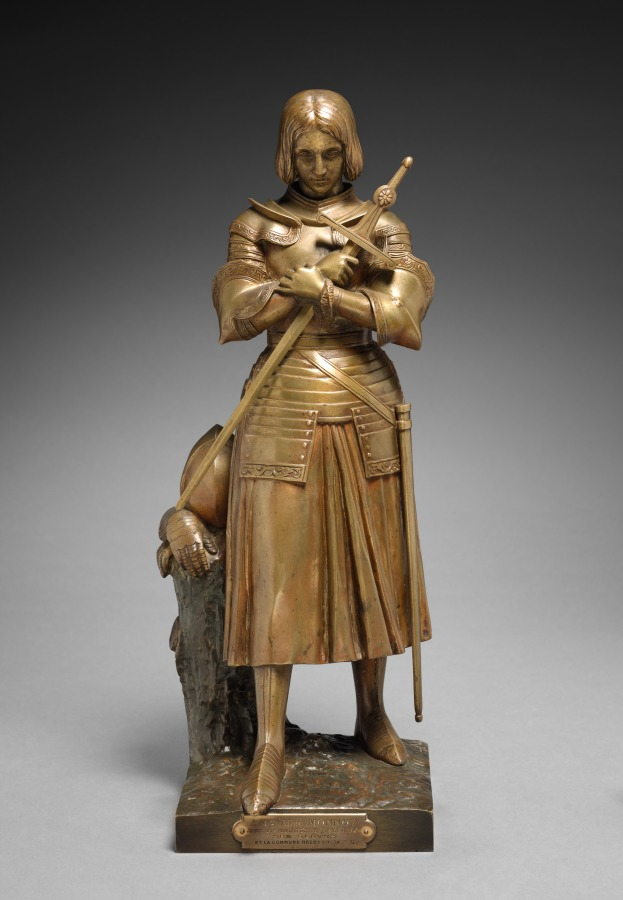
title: St. Joan of Arc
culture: France, 19th century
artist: Princesse Marie-Christine d' Orleans (French, 1813–1839)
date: 1836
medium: bronze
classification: Sculpture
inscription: Signed on top of base: "Marie d'Orléans."; inscribed on left side of base: "Susse Fres Edts Paris."